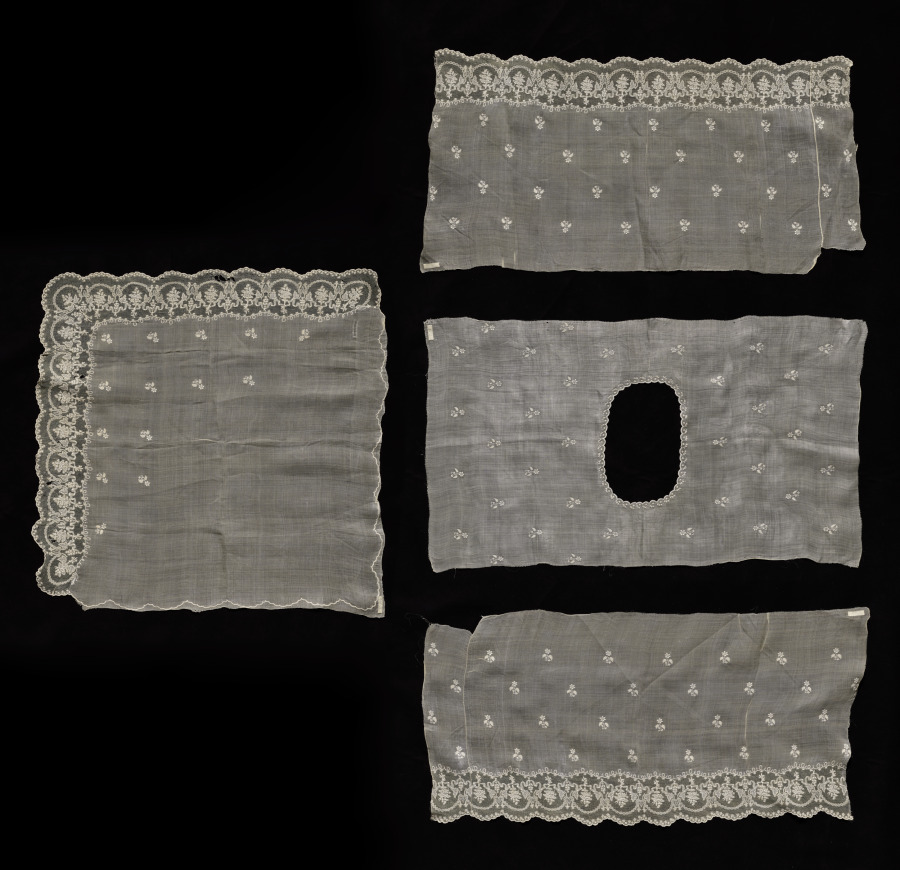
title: Blouse in four pieces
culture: Philippines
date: 1800s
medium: Plain weave piña; needle lace (drawnwork) and white cotton embroidery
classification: Embroidery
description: This group consists of coordinated clothing components made of fine piña cloth in plain weave, all worked in matching hand-embroidered cotton motifs. The set includes a fichu, an unsewn blouse front (pechera), and two unsewn sleeve panels. All four pieces share the same ground material, embroidery thread, and design vocabulary, indicating that they were intended as elements of a single baro-camisa ensemble.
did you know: Because piña is more translucent than abacá, it has historically been considered more prestigious.